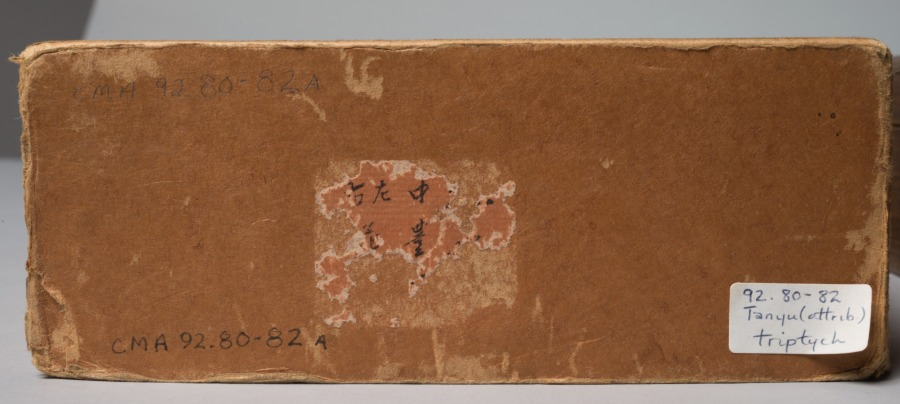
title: Sparrows on Blossoming Plum; A Sage with Tiger; Chinese Bird on Snow-Laden Branch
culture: Japan, Edo period (1615–1868)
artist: Kano Tan’yū (Japanese, 1602–1674)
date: 1661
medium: Triptych of hanging scrolls; ink and slight color on silk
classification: Painting